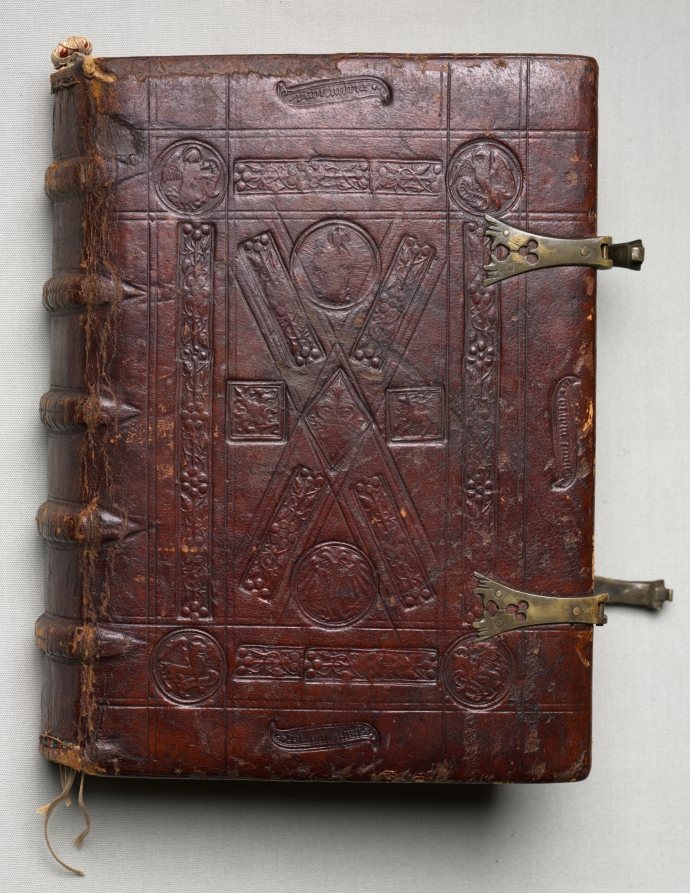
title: Gospel Book with Evangelist Portraits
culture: Germany, Middle Rhine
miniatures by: Master of the House-Book (German, c. 1470–1500)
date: c. 1480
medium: ink, tempera, and gold on vellum; original blind stamped leather binding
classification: Bound Volume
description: The four gospels are preceded by a full-page portrait miniature of the appropriate evangelist. Per tradition, they are represented as contemporary scribes surrounded by all the tools of their trade—ink pots, quill pens, and penknives. The anonymous illuminator of these miniatures, called the Hausbuch Master, is known primarily for an album of lively drawings as well as some 90 copper engravings now in Amsterdam. He was also apparently a panel painter of some distinction. The skillful pen work, tracery, and vine scrolls, as well as the large initials, are the work of other artists. The binding is original.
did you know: The Hausbuch Master, also a printmaker, is thought to be the first artist to use a form of engraving known as drypoint.